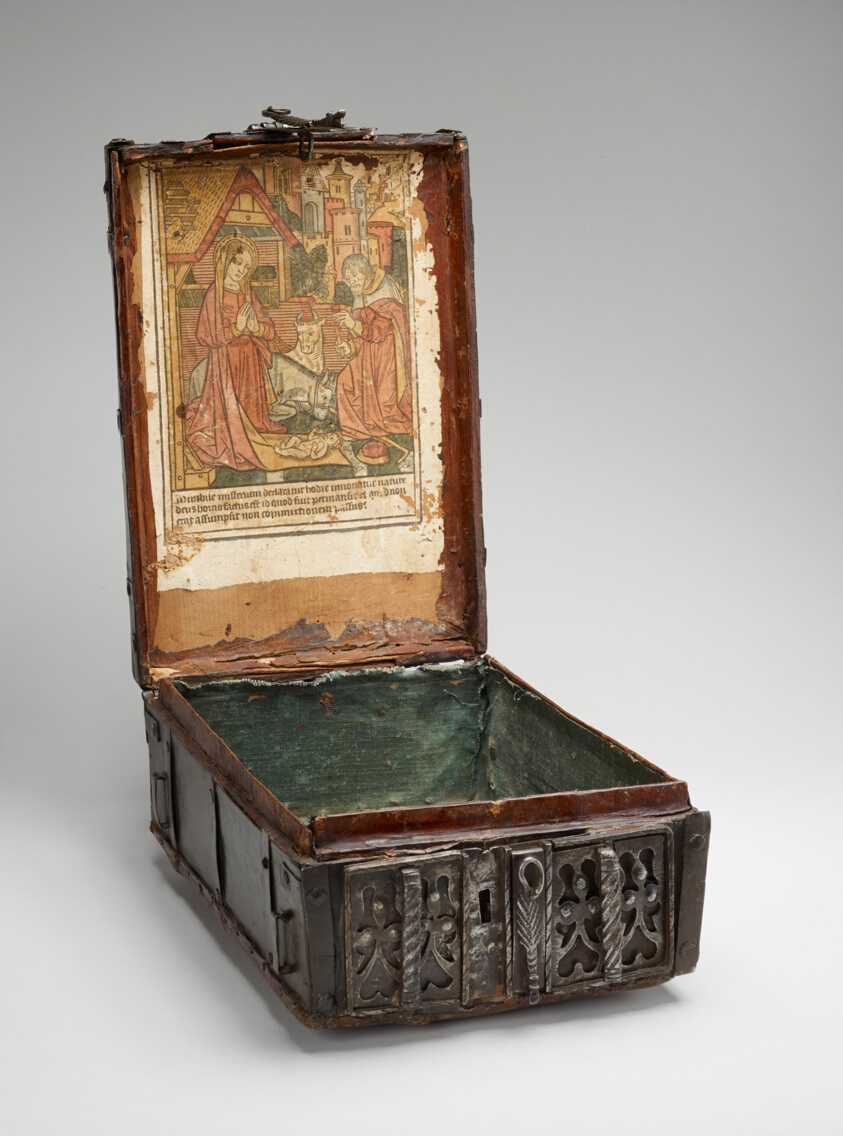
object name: Print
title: The Nativity, in Coffer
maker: Workshop of the Master of the Very Small Hours of Anne of Brittany (French, active Paris, 1480-1510); coffer by an unknown maker (French, 15th century)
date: c. 1490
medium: Woodcut in black, hand colored with brush, stencil and watercolor on ivory laid paper mounted on the inside cover of a coffer, constructed of wood, iron, leather, horsehair and linen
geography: France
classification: woodcut; print; prints and drawing